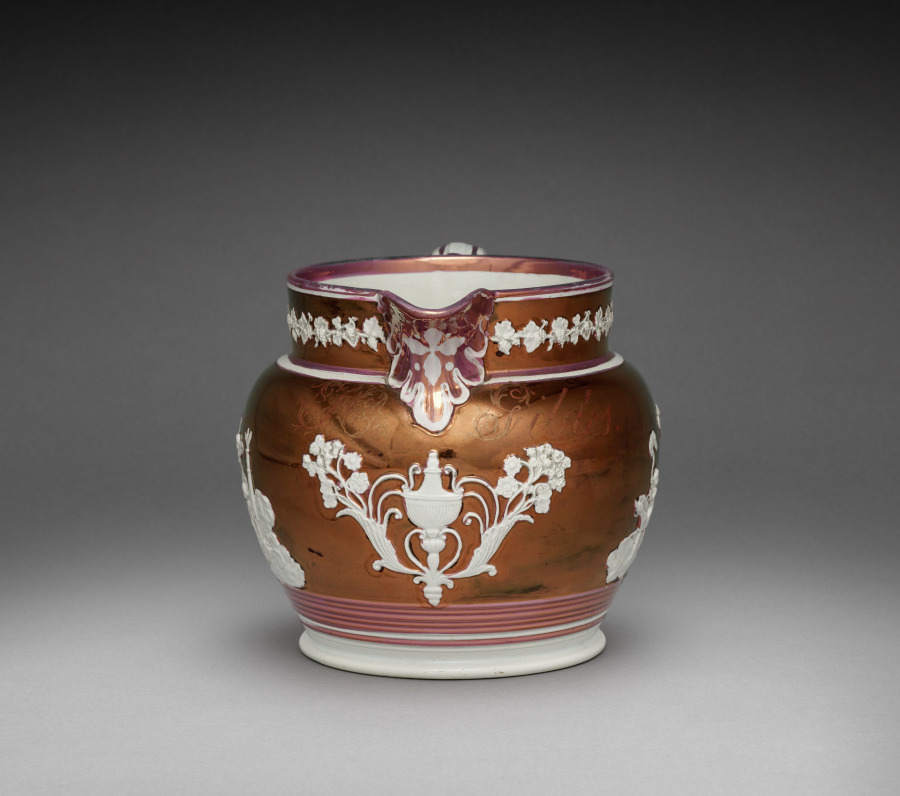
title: Pitcher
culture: England, Staffordshire, 18th century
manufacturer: Staffordshire Factory (British)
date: late 1700s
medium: lusterware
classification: Ceramic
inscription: engraved in script letters on body of pitcher directly under the lip: "T. C. Gibbs."